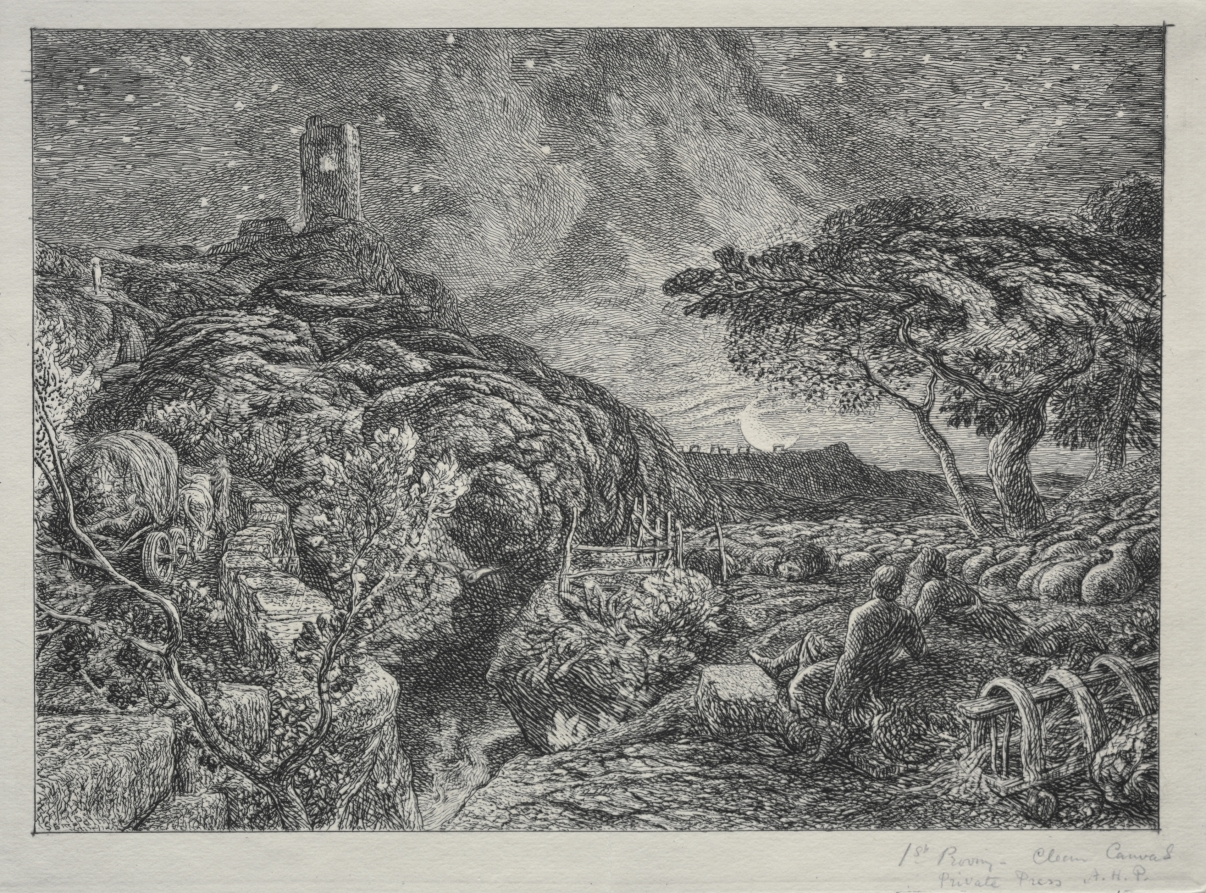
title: The Lonely Tower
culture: England, 19th century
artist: Samuel Palmer (British, 1805–1881)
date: 1879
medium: etching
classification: Print